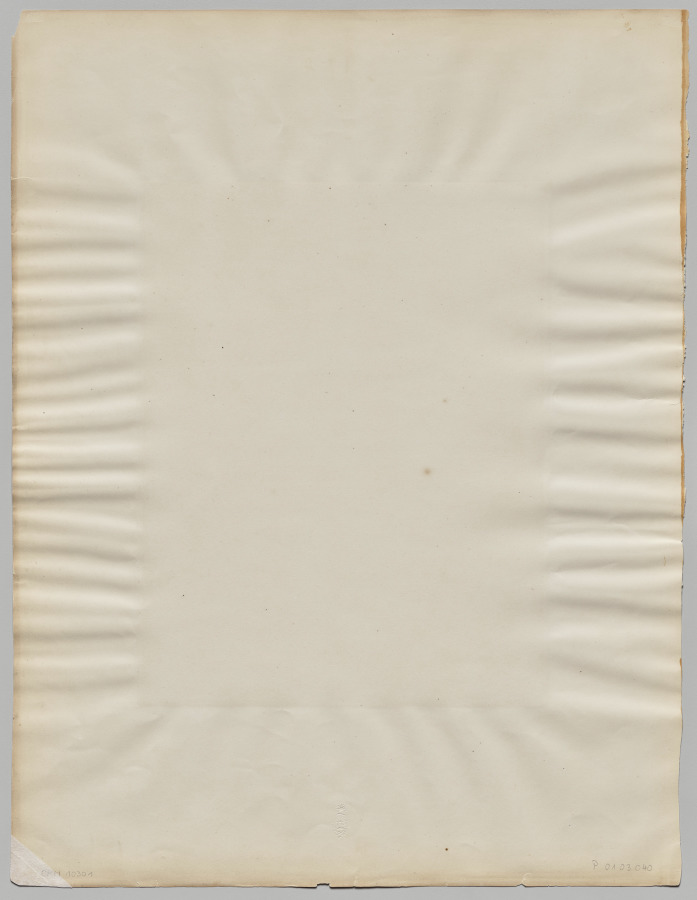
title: Perumal Temple Vimana from Corner of Court, Madurai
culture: England, 19th century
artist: Captain Linnaeus Tripe (British, 1822–1902)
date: 1858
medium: albumen print from a waxed paper negative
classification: Photograph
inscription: Imprinted in black type on white paper adhered to recto of mount: "8"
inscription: Embossed on recto of mount:"LT/Photographer to Government"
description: Although the temple would have been crowded with worshippers, Tripe shows us empty spaces. His paper negatives and primitive lens required long exposures, even in the bright sunlight of India—too long to record an individual in motion. Tripe, photographing for the colonial government, may also have used his official status to have the temple cleared of visitors so he could obtain unobstructed views of the architecture.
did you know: The architecture was probably painted with bright colors, but Linnaeus Tripe’s photographic technology captured only a monochromatic range of tones.